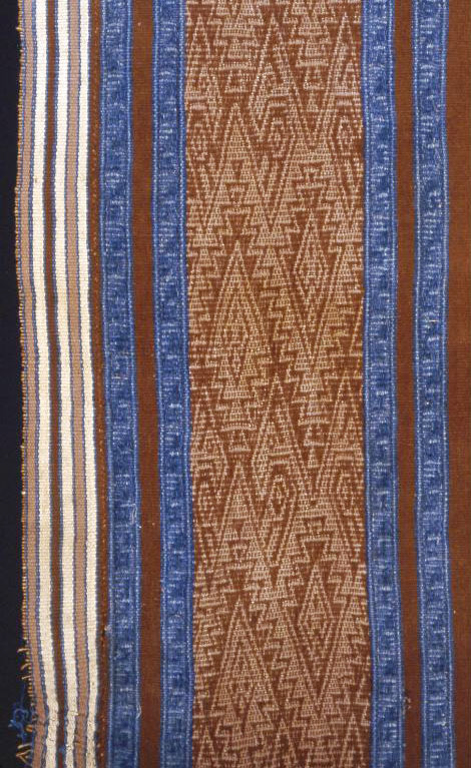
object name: Textile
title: Fragment (Band)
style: ica, late intermediate period, Pre-Columbian, americas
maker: Ica (Peru)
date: A.D. 1000/1532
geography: Peru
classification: textile; weaving